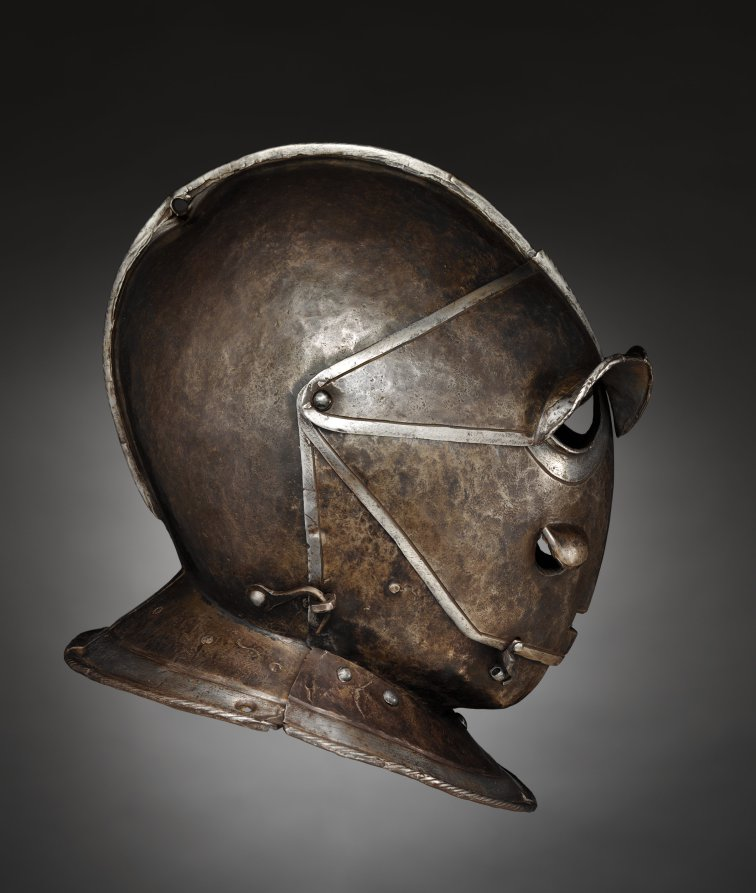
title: Savoyard Helmet (Todenkopf)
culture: Italy or Germany, early 17th century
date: c. 1600–20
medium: steel, blackened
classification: Arms and Armor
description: The term “Savoyard helmet” is used today to evoke the elite cavalry units formed by Charles Emanuel I, Duke of Savoy (1580-1630). Such helmets were designed principally to withstand and protect the wearer from shot from the powerful wheel-lock guns of the day, though their secondary function was to intimidate and terrify. The design of the helmet suggests a human face or skull. They were known as todenkopf or “death’s head” helmets in Germany. The helmet would have originally been associated with a three-quarter cuirassier armor. Similar armors are displayed nearby.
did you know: This type of helmet is also called a "todenkopf," translating to "death's head."